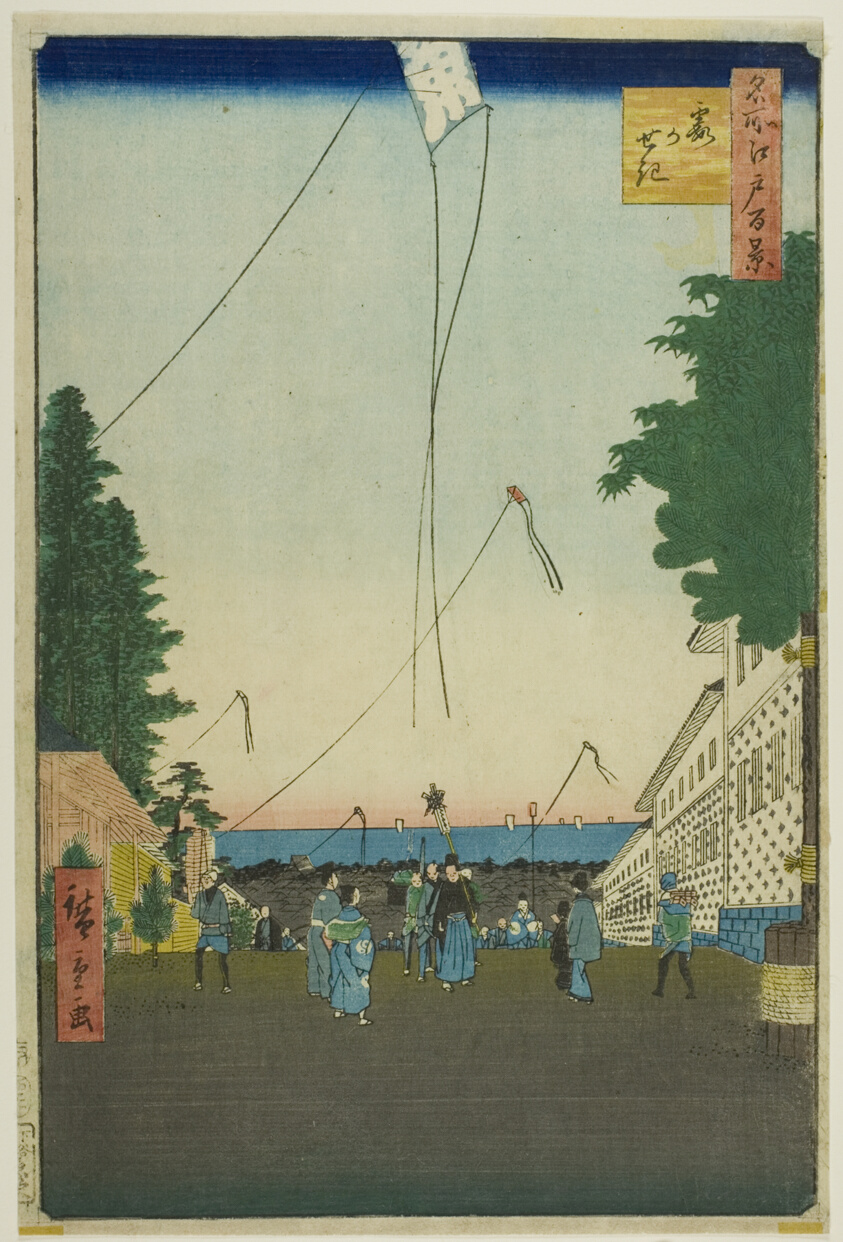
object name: Print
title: Kasumigaseki, from the series “One Hundred Famous Views of Edo (Meisho Edo hyakkei)”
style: Japanese (culture or style)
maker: Utagawa Hiroshige 歌川 広重; Japanese, 1797–1858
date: 1857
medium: Color woodblock print; oban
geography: Japan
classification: woodblock print; print